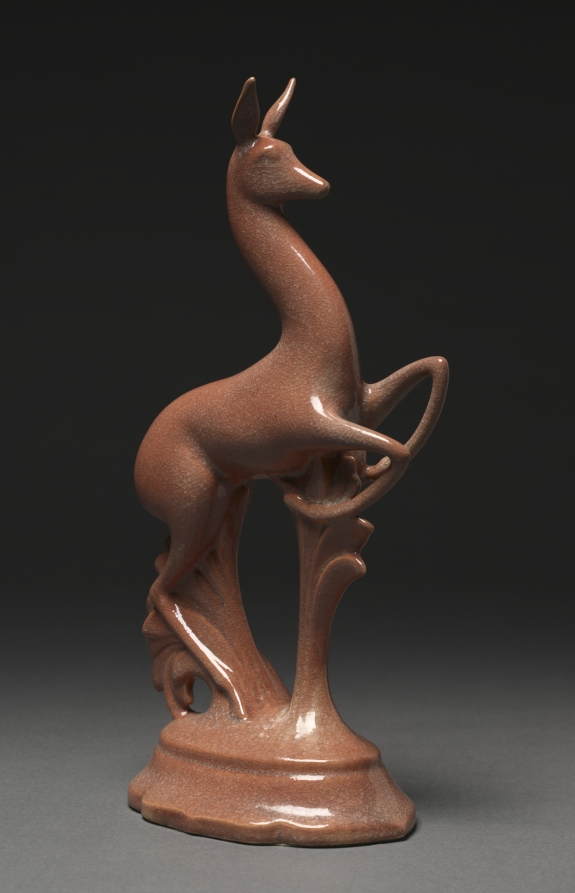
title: Fawn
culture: America, Ohio, Cleveland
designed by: Waylande Gregory (American, 1905–1971)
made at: Cowan Pottery Studio (America, Ohio, Rocky River, 1920–1931)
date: 1929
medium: earthenware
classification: Ceramic